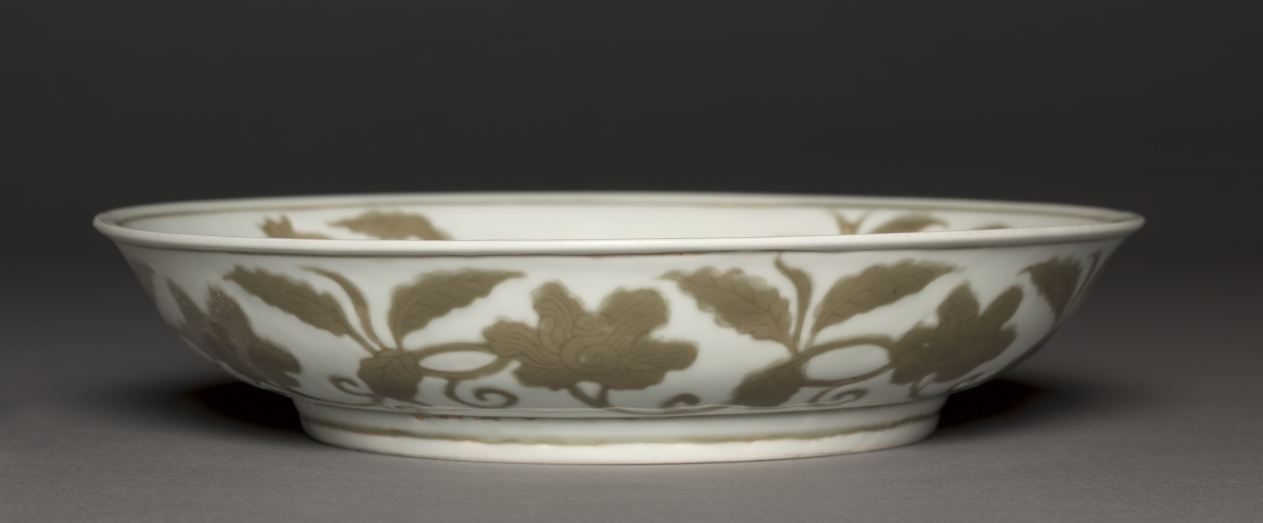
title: Dish with Spray of Gardenia amidst Pomegranate, Lotus, and Grapes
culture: China, Jiangxi province, Jingdezhen kilns, Ming dynasty (1368-1644), Hongzhi mark and reign (1488-1505)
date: 1488–1505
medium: porcelain with incised and underglaze coffee brown (iron oxide) decoration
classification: Ceramic